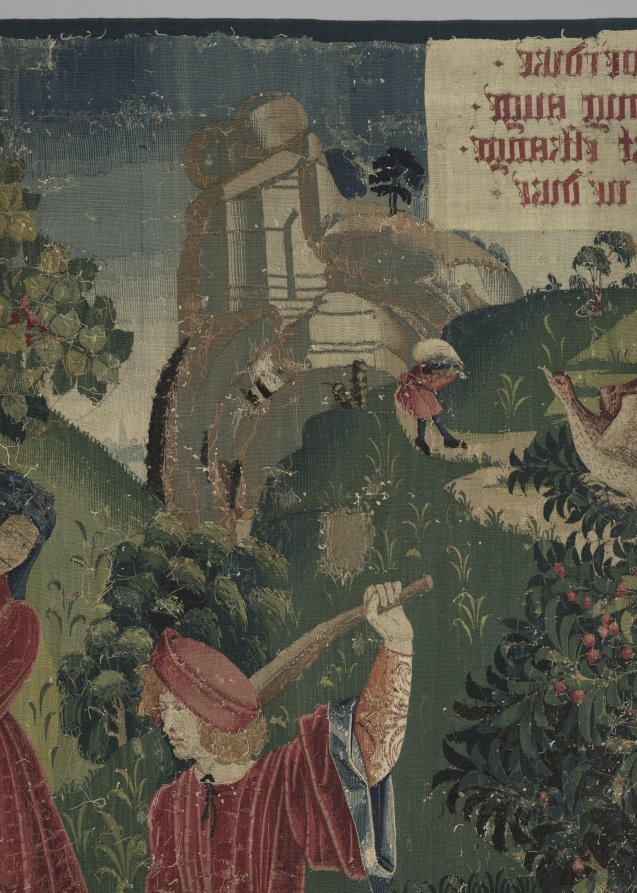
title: Time (from Chateau de Chaumont set)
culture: France, Lyon(?), early 16th century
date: 1512–15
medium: silk and wool; tapestry weave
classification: Tapestry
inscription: French verse in Gothic letters translates as follows: "One sees the weather adorned in green, Sometimes as pleasing as an angel; To suddenly change and be quite strange, The weather never stays the same."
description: Pierre Sala, who likely commissioned the set, is portrayed as the richly attired central figure offering a bouquet, a symbol of knowledge, to Éléonore, his daughter. Éléonore is pregnant, revealed by her upturned skirt and the persimmon in her husband Hector’s hand. Hector’s mother, Marguerite, in dark attire, will wed the widowed Sala in 1519. They appear in front of the royal chateau of Blois. The figures at the right convey Sala’s advice to his children. Time (the old man with the staff) with Clio, the Muse of History, standing on his shoulders, is being attacked by a Herculean youth wielding a stick. With this allegory, Sala is explaining that youth is ignorant of the complexities of life and time. The small unicorn at the far right represents the soul. The verse in Old French at the top refers to changing time: One sees Time adorned with green foliage, Sometimes as pleasant as an angel, Then suddenly change and become quite strange. Never does Time persist in one state.